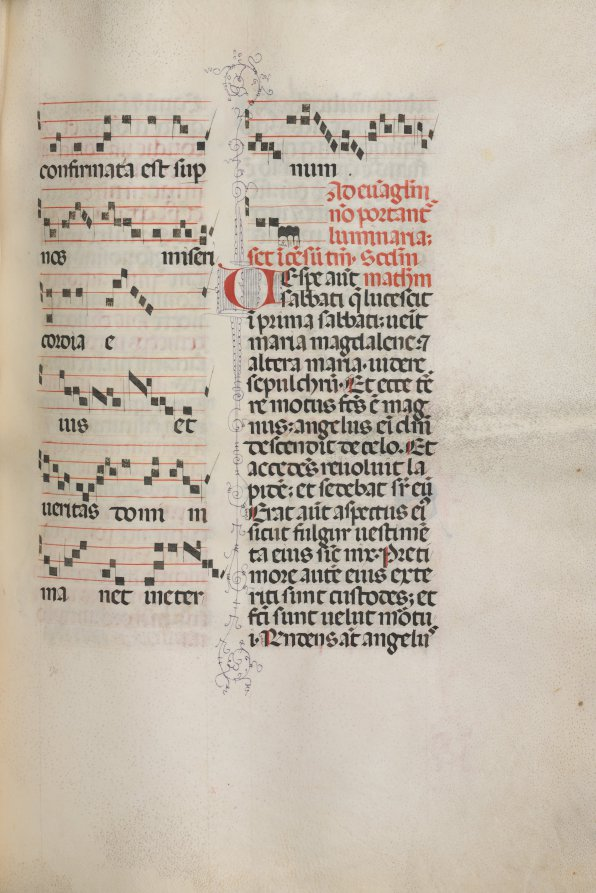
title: Missale: Fol. 172: Music for "Alleluia" etc. at beginning of Easter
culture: Italy, Perugia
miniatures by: Bartolommeo Caporali (Italian, c. 1420–1503)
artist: assisted by Giapeco Caporali (Italian, d. 1478)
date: 1469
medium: ink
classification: Bound Volume